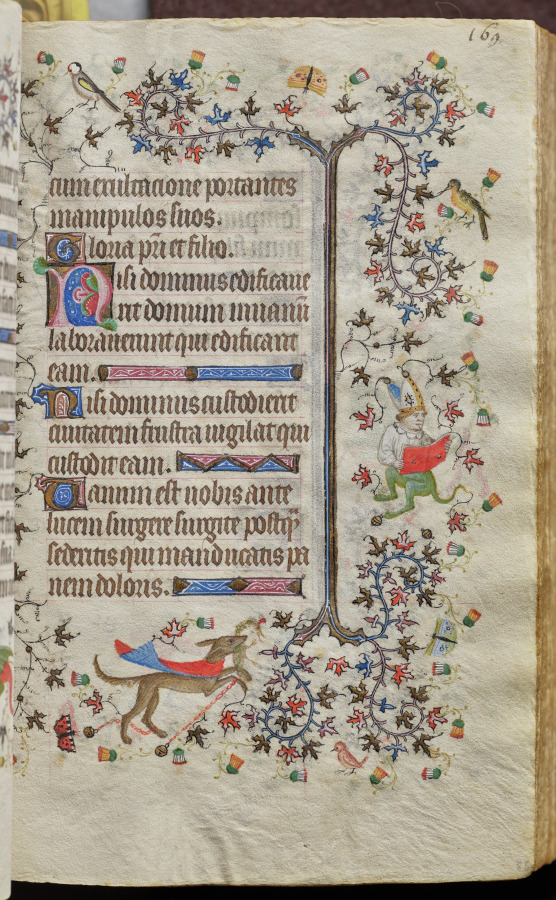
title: Hours of Charles the Noble, King of Navarre (1361-1425): fol. 85r, Text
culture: France, Paris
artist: Master of the Brussels Initials and Associates (French)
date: c. 1405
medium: ink, tempera, and gold on vellum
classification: Bound Volume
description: This precious volume was obviously highly prized by its owner, the French-born King of Navarre, who had his coat of arms painted on no less than twenty folios. Rather than directly commissioning this manuscript from a specific workshop, it seems that Charles the Noble acquired his book of hours -- perhaps ready-made for the luxury market -- while on a trip to Paris in 1404-05. A collaborative effort, six painting styles are evidenced within the pages of this codex, those of two Italians, two Frenchmen, and two Netherlanders. The painter who was responsible for the planning and decoration of the book, and who produced seventeen of the large miniatures, was a Bolognese artist known as the Master of the Brussels Initials. His principal assistant, responsible for most of the borders, was a Florentine who signed his name "Zecho" da Firenze on folio 208 verso.